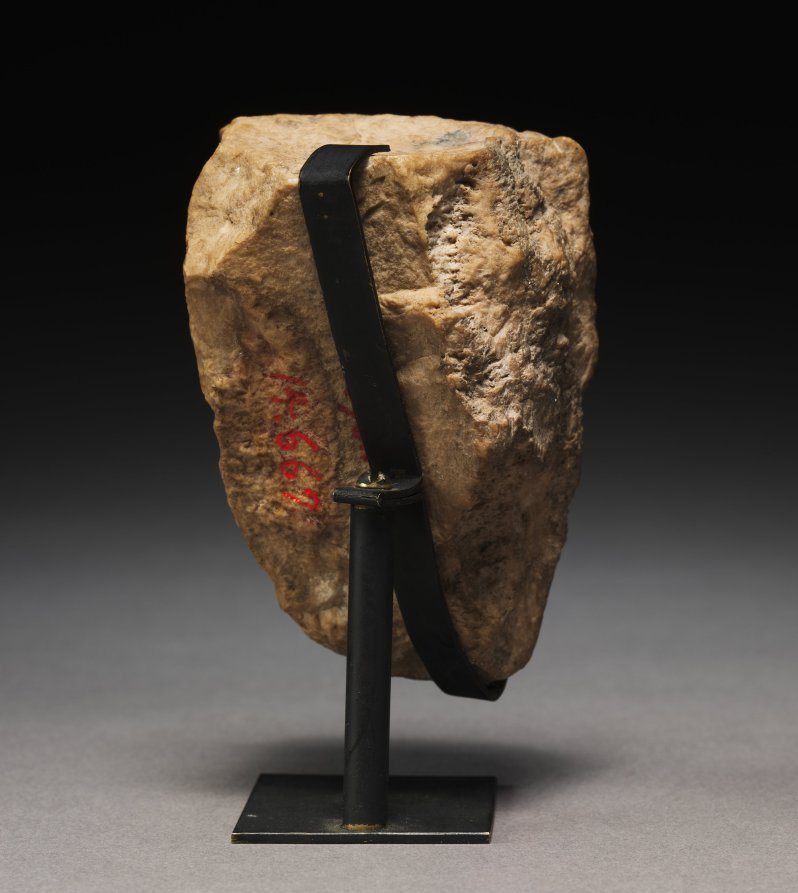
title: Fragment of a Feather-Garmented Figure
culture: Egypt, New Kingdom (1540–1069 BCE)–Third Intermediate (1069–715 BCE)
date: 1540–715 BCE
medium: limestone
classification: Sculpture